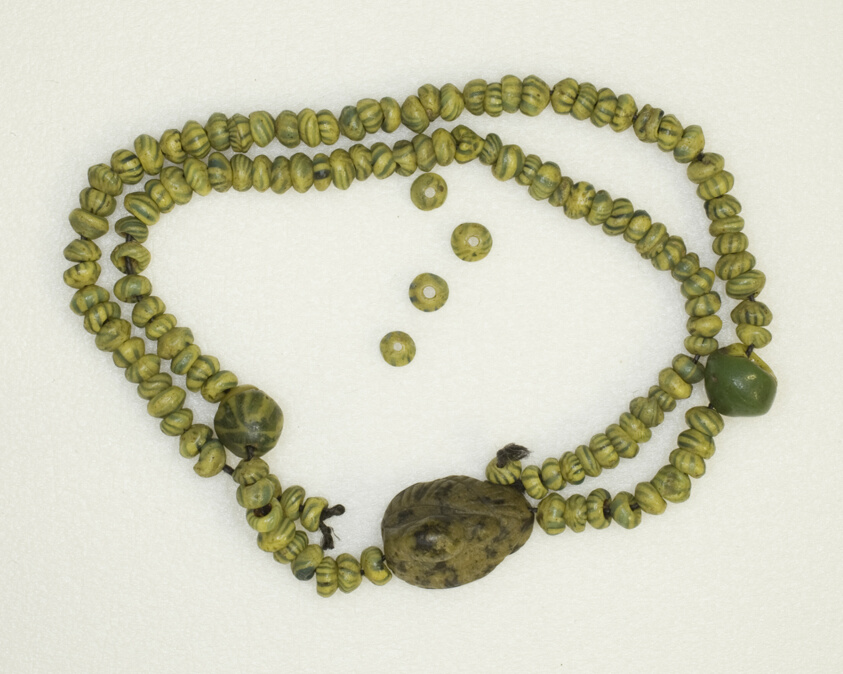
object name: Costume and Accessories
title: Amulet of a Duck (strung on beads)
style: egyptian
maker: Egyptian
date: New Kingdom or later (about 1550 BCE or later)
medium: Stone (amulet)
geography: Egypt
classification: amulet; jewelry; stone; ancient art; costume